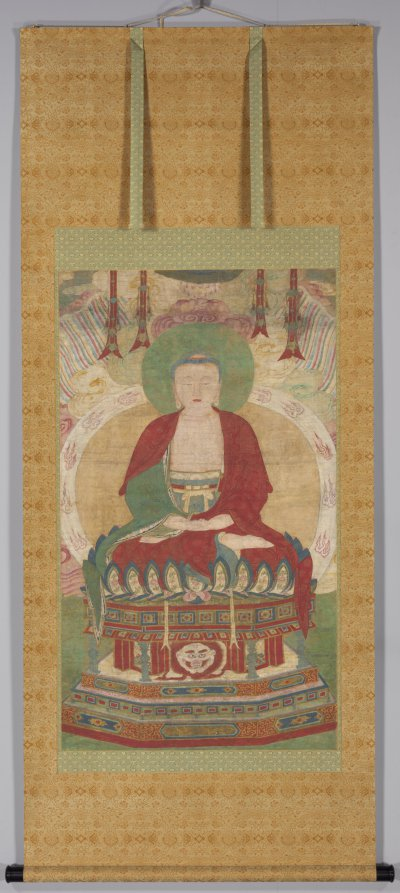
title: Seated Amitābha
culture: Chinese, Ming dynasty (1368-1644)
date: late 1500s–early 1600s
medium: hanging scroll; ink and color on silk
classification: Painting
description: This magnificent Buddha, called Amitābha (literally, “infinite light”) is seated on a lotus pedestal with both palms facing up over crossed legs, suggesting that it is in deep meditation. In contrast to the richly ornamented throne on which the Buddha is seated, the figure itself is devoid of any jewelry or decorative attributes, emphasizing its enlightened status and detachment from worldly affairs. The lion head in the center of the pedestal is a motif from Central Asia, which can also be seen in the halo or nimbus of Chinese Buddhist stone steles.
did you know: Originally, this scroll was acquired by the museum as a Korean work, but has now been tentatively reattributed as Ming period Chinese.